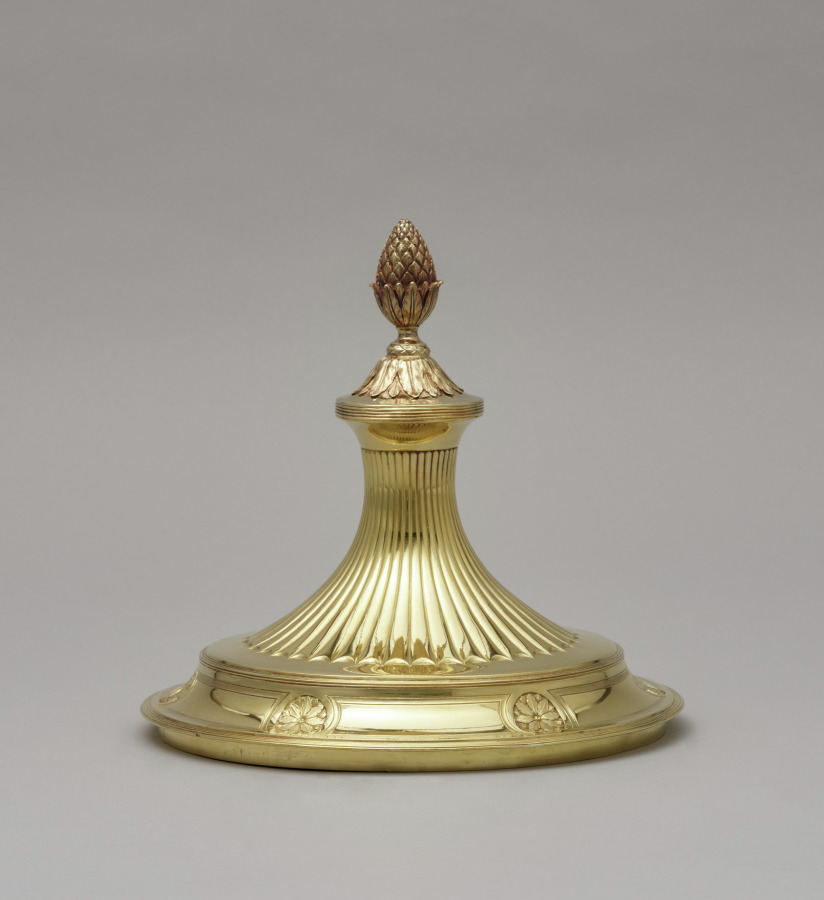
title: Cover for a Trophy Cup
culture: England, 18th century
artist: firm of Peter Bateman (British, 1740–1825)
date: 1792–93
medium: silver gilt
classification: Silver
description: Silver fulfilled a prominent role in projecting wealth, status, power, and ritual in British life during the 1600s and 1700s. Elaborate forms such as the trophy that accompanies this lid, with its swags of flowers, neoclassical rosettes, and acanthus spears, not only represented wealth in its sheer silver weight but also provided royal and aristocratic owners a surface for displaying engraved coats of arms. Engraved on one side of the trophy cup can be found the arms of Robert Grosvenor (1767–1845), the first Marquess of Westminster, and Lady Eleanor Egerton (1770–1846), whom he married in 1794, a year after the trophy’s completion. The other side depicts preparations for a horserace, the most culturally significant leisure activity enjoyed by aristocratic families in the 1700s. Grosvenor owned a number of famous horses and was likely awarded this trophy following a successful race.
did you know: This is a lid to a trophy cup. See cover record.